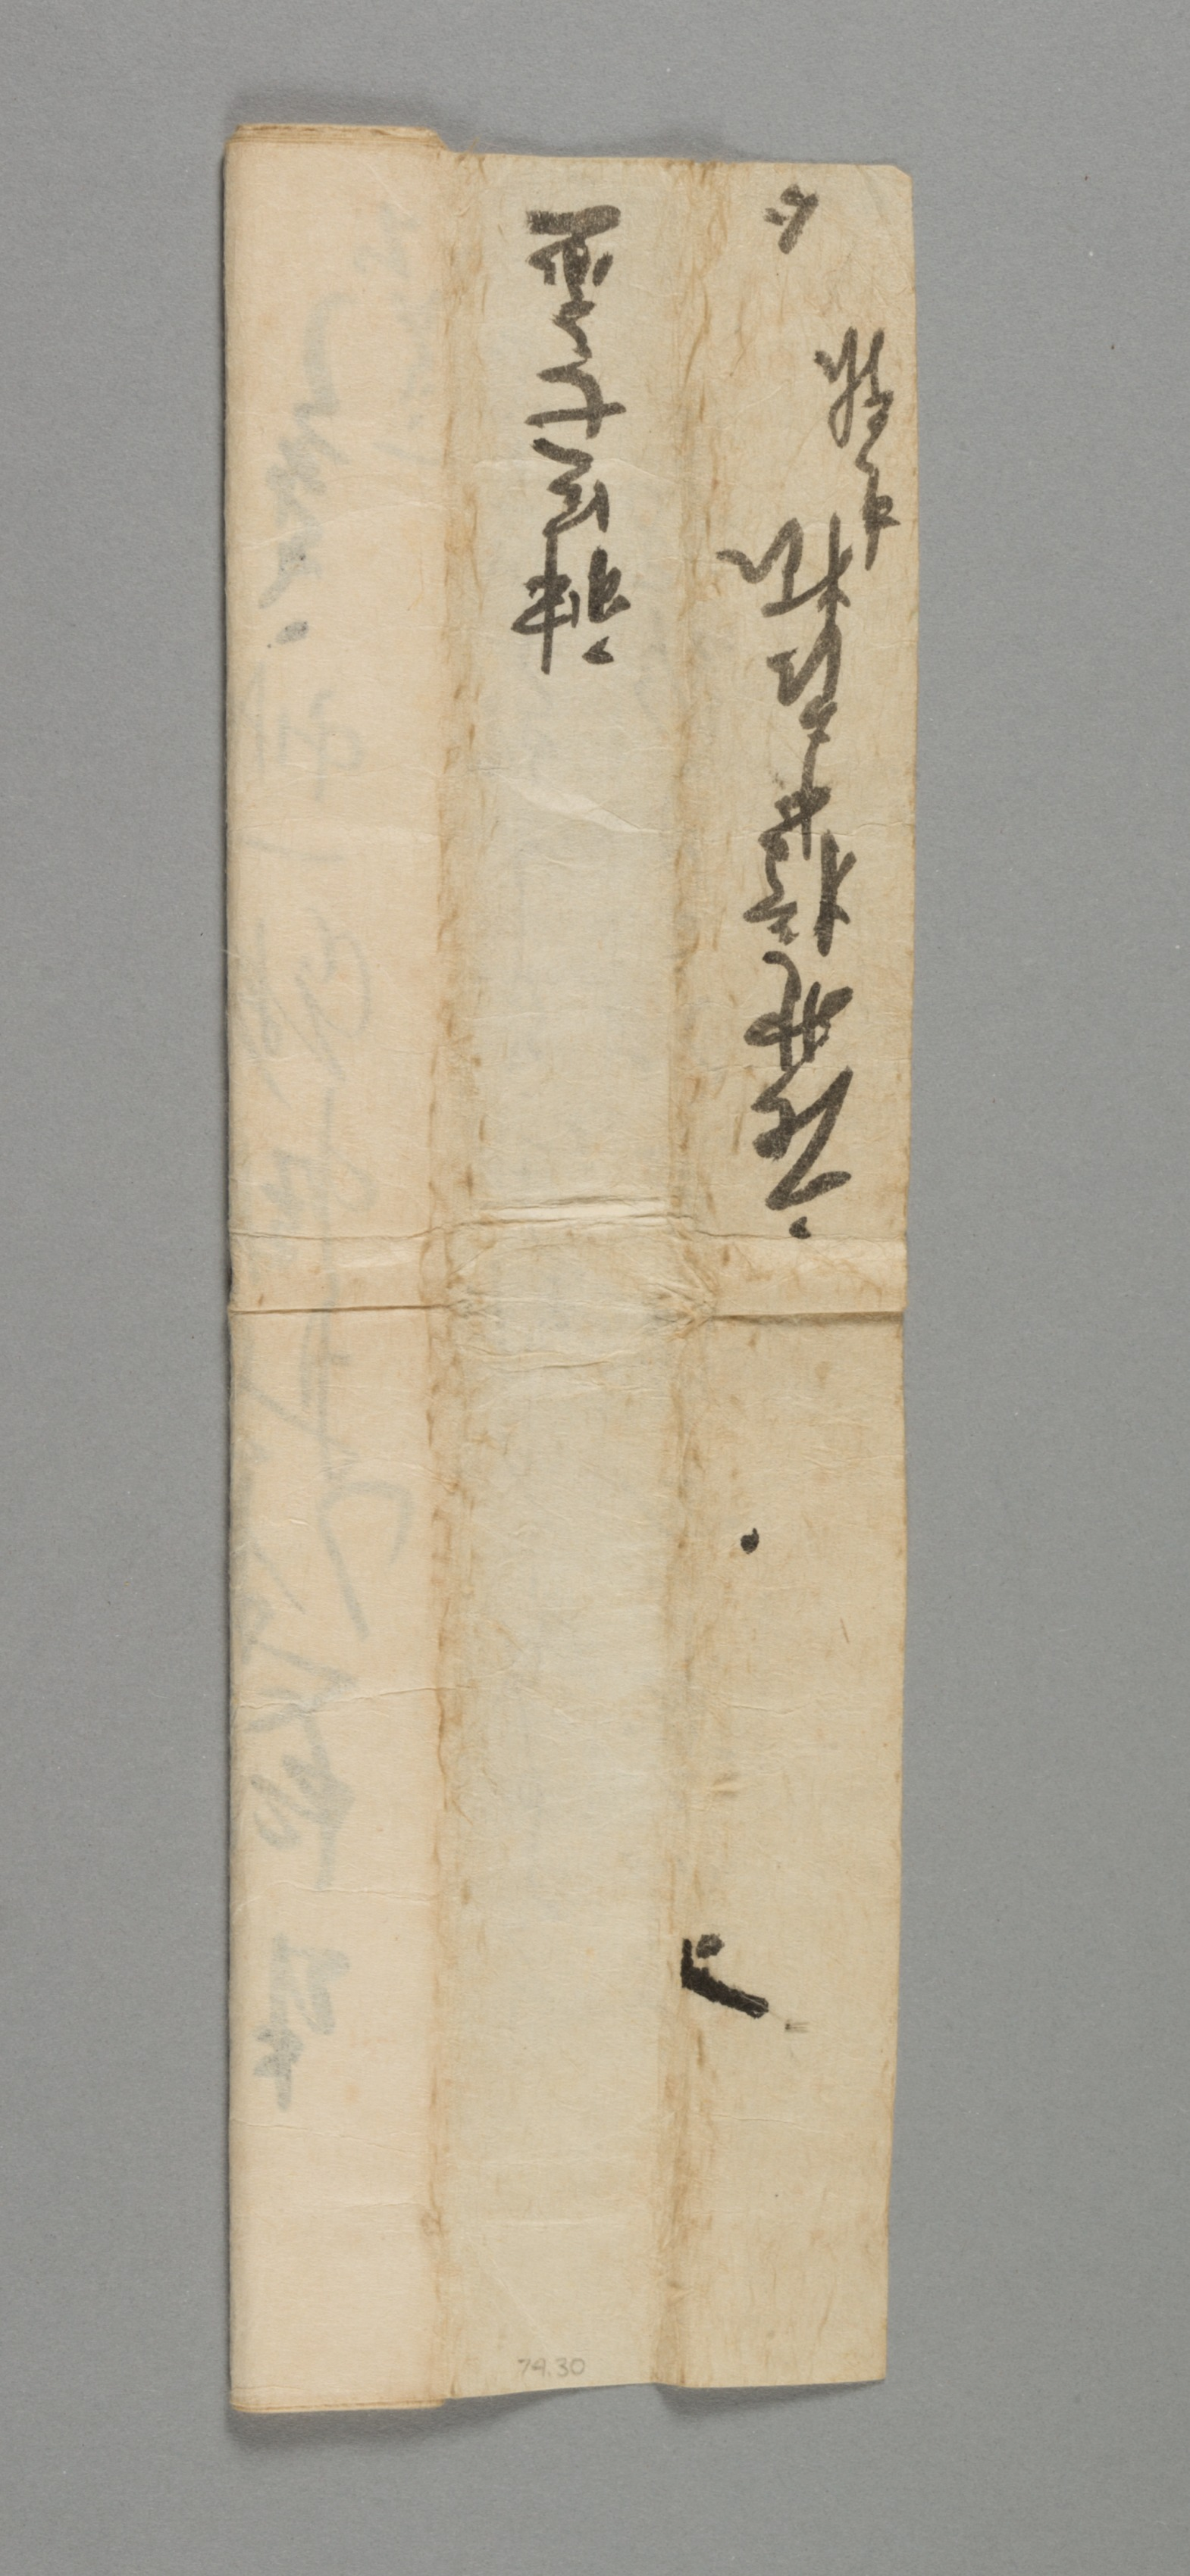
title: Crow on a Pomegranate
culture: Japan, Muromachi period (1392–1573)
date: 1500s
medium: hanging scroll; ink on paper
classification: Painting